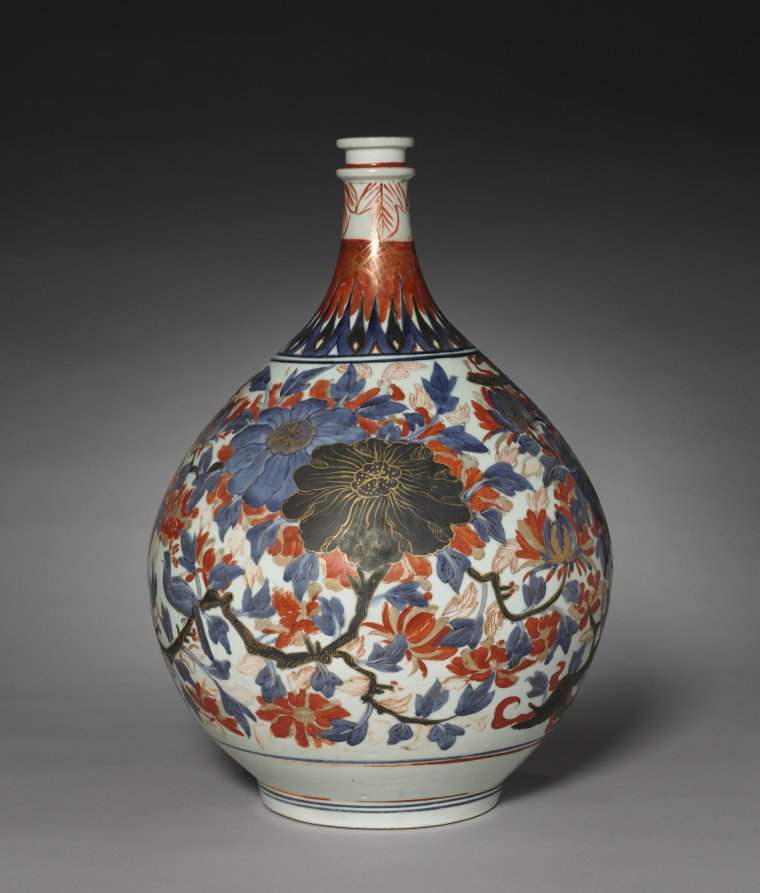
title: Apothecary's Bottle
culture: Japan, Edo period (1615–1868)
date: 1670s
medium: porcelain with underglaze blue and overglaze color enamels (Hizen ware, Arita type)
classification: Ceramic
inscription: on bottom: "IC" (probably stands for Joannes Camphuys, 1634-1695).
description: The decoration of this white porcelain bottle was achieved through a multistep process. First, some decorative elements, like the deep blue forms, were applied with glaze and then fired. Enamels were brushed on to achieve the bright colors. This bottle was probably in the collection of Johannes Camphuys (1634-1695), who was in charge of the Dutch residential island of Deshima in Nagasaki harbor.